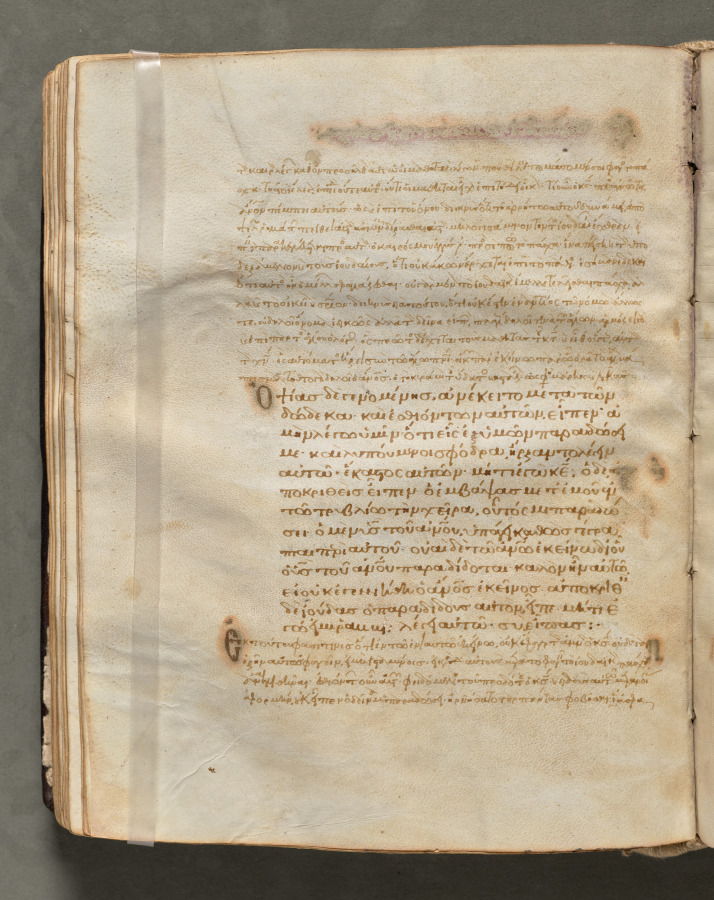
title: Text, folio 116 (verso), from a Gospel Book with Commentaries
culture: Byzantium, Constantinople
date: c. 1000–1100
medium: ink, tempera, and gold on vellum; leather binding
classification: Bound Volume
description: Each of the four gospels in this book opens on a page with brilliantly illuminated borders depicting the author of the text as well as birds-principally peacocks, symbols of the immortality of the soul-and fountains, representing the fountain of life and the salvation of the soul. This volume consists of 428 leaves with texts in Greek. Its level of sophistication suggests that it was probably written and decorated in a monastery in Constantinople.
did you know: Gospel Books were carried in procession through Byzantine churches.